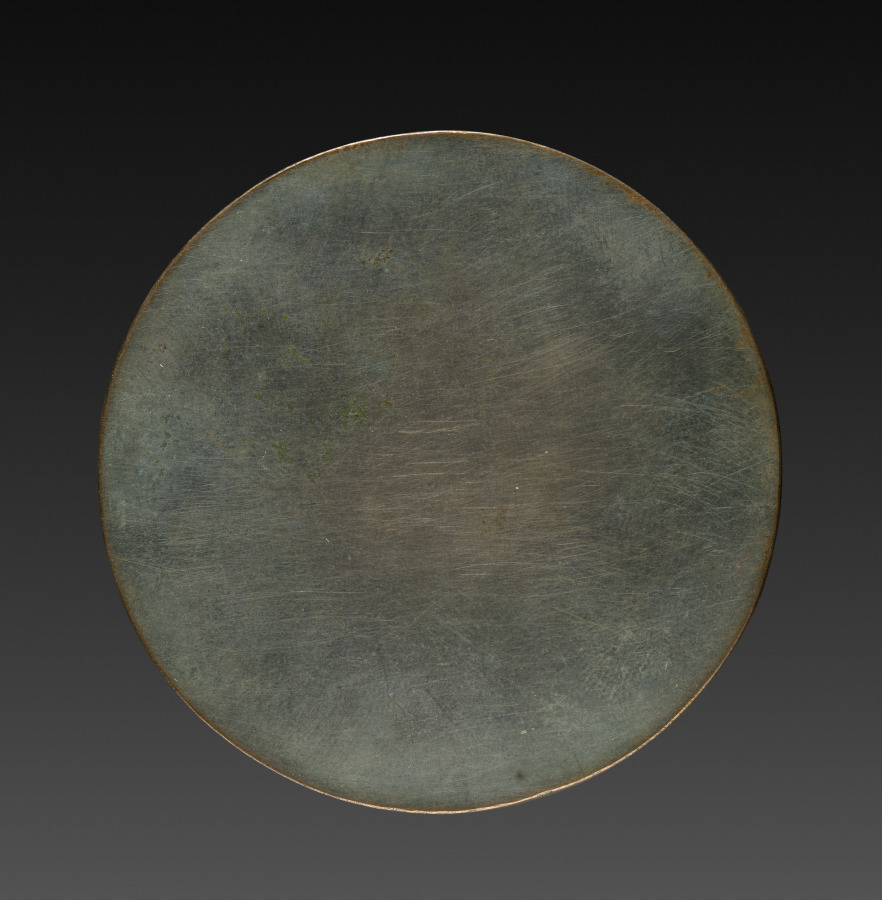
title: Mirror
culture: Japan, Edo period (1615–1868)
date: 1615–1868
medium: bronze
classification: Metalwork